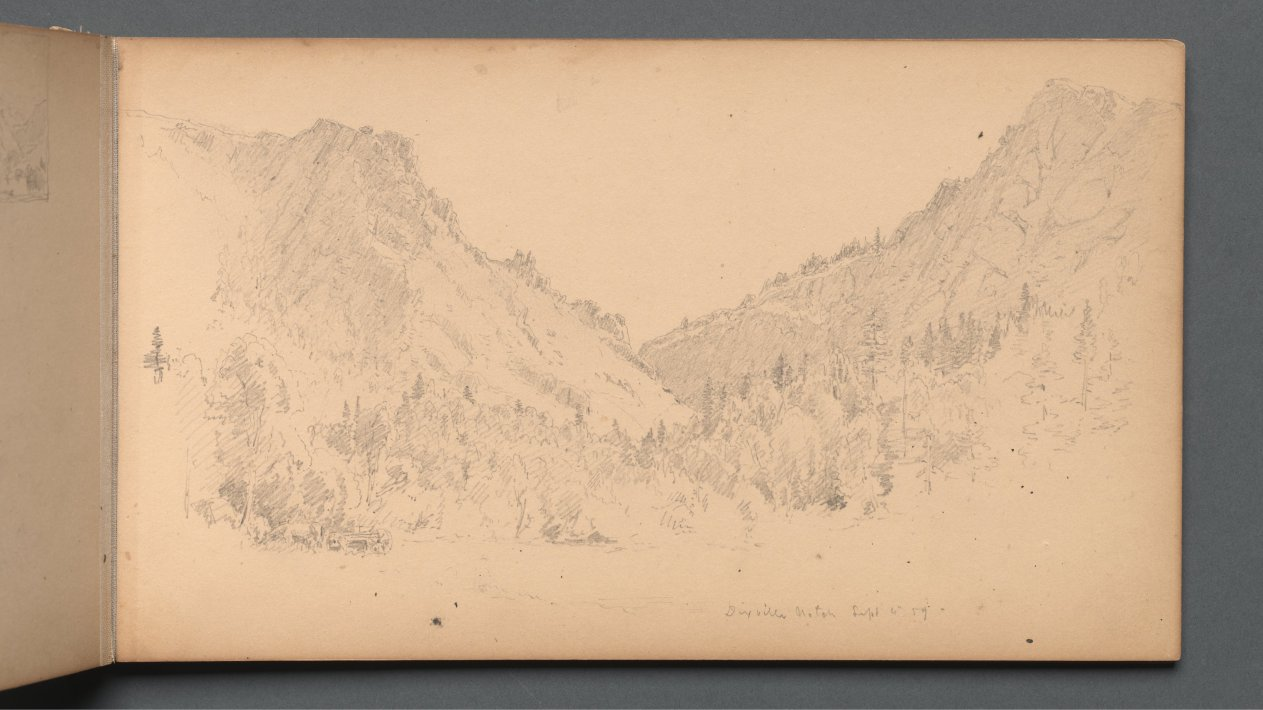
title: Sketchbook, page 18: "Dixville Notch, Sept. 4, 89"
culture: America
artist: Sanford Robinson Gifford (American, 1823–1880)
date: 1859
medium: graphite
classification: Bound Volume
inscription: by artist, lower right, in graphite: Dixville Notch Sept. 4th 59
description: Gifford was an American landscape painter belonging to the second generation of Hudson River school artists. Based in New York City with a studio at the Tenth Street Studio Building, Gifford took annual summer trips to the Catskills, the Adirondacks, and other scenic locations in New England. This sketchbook accompanied the artist on his expedition in 1859 to New Hampshire and Maine, where he drew sites such as Dixville Notch, the White Mountains, and Peaks Island, Casco Bay. Gifford used such graphite studies as the basis for oil paintings worked up in his studio, such as A Home in the Wilderness (1866).